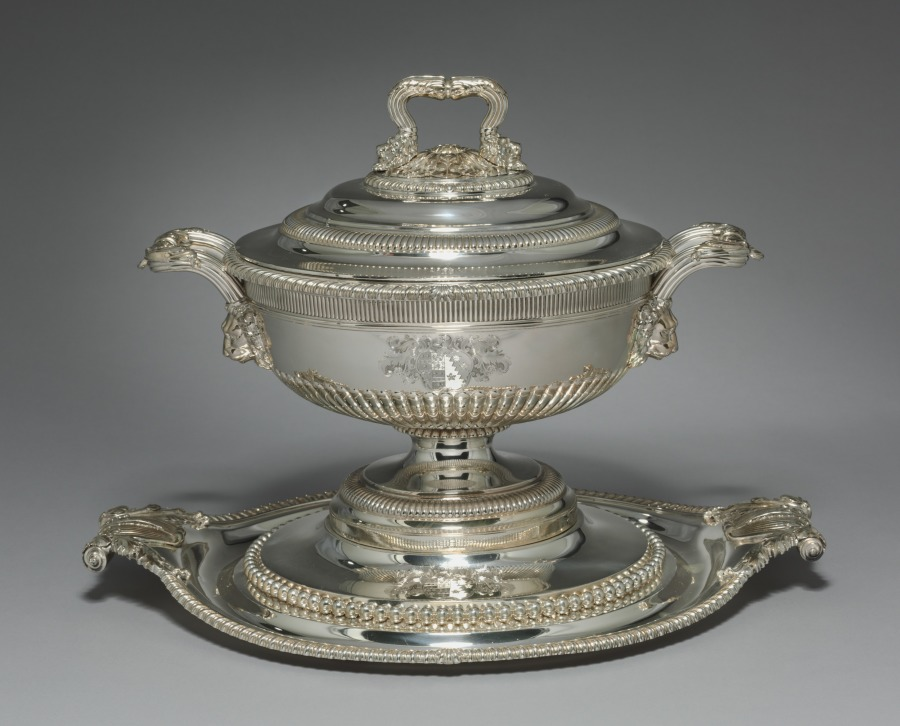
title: Covered Tureen on Stand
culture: England, London, 19th century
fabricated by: Paul Storr (British, 1771–1844)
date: 1812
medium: silver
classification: Silver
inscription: Coat of arms: Hutton impaling Chaytor; crest: Hutton. (Arms of Timothy Hutton (1779-1863) of Marske and Clifton Castle, Yorkshire, and his wife Elizabeth Chaytor of Spennithorne Hall, who were married in 1804.)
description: Silver fulfilled a prominent role in projecting wealth, status, power, and ritual in British life during the 1600s and 1700s. Elaborate forms such as this tureen, with its lionhead finials, acanthus leaves, and fluted detailing, not only represented wealth in its sheer silver weight but also provided royal and aristocratic owners a surface for displaying engraved coats of arms. The arms of the High Sheriff of Yorkshire, Timothy Hutton and his wife Elizabeth Chaytor of Spennithorne Hall in northern England are engraved on this tureen and stand by Paul Storr, one of the most prominent London silversmiths of the period.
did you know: While the word “tureen” was derived from the Latin word terrine, the name has also long been associated with the Marshal of France, Vicomte de Turenne (1611–1675), who according to legend once drank soup from his helmet.